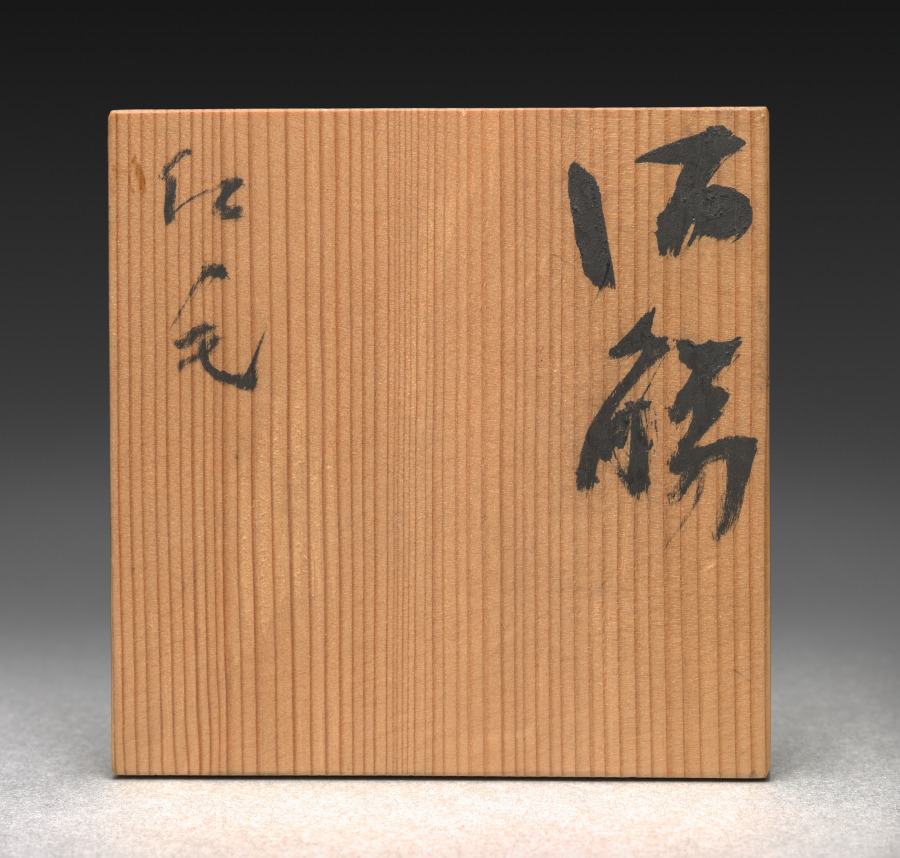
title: Incense Box: Seto Ware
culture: Japan, Kamakura period (1185–1333)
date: 1200s–1300s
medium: glazed stoneware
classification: Ceramic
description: Old Seto, also called Koseto ware, was typically coated with an ash glaze in the mineral feldspar, which produced a yellow or grayish-green glaze. This palette appealed to medieval Buddhist priests and samurai alike. The practice of burning incense in religious, court, and domestic settings dates from the early 700s in Japan.